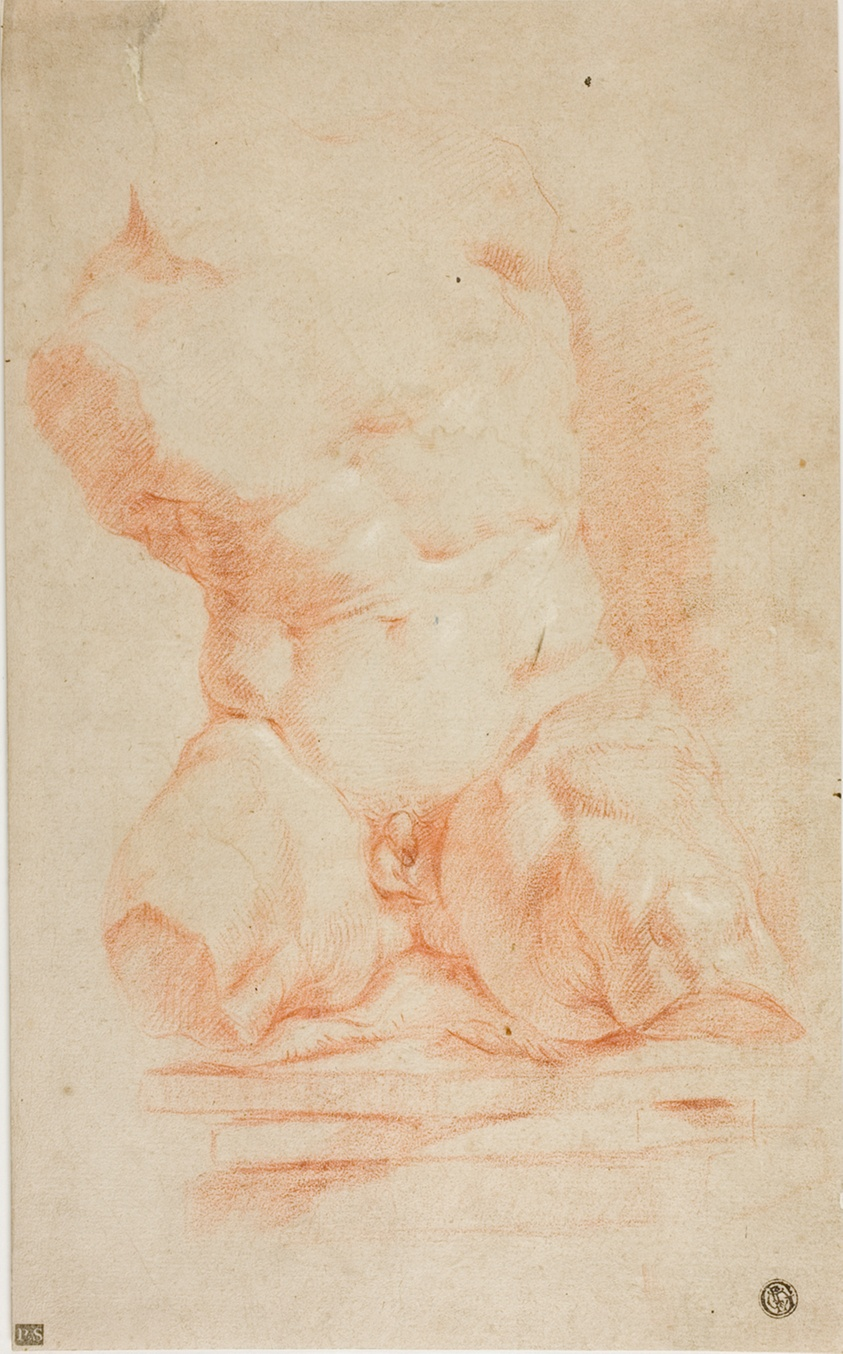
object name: Drawing and Watercolor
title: Belvedere Torso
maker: Peter Paul Rubens; Flemish, 1577-1640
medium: Red chalk, heightened with white chalk, on tan laid paper, laid down on ivory laid paper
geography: Flanders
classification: chalk; drawings (visual works); prints and drawing